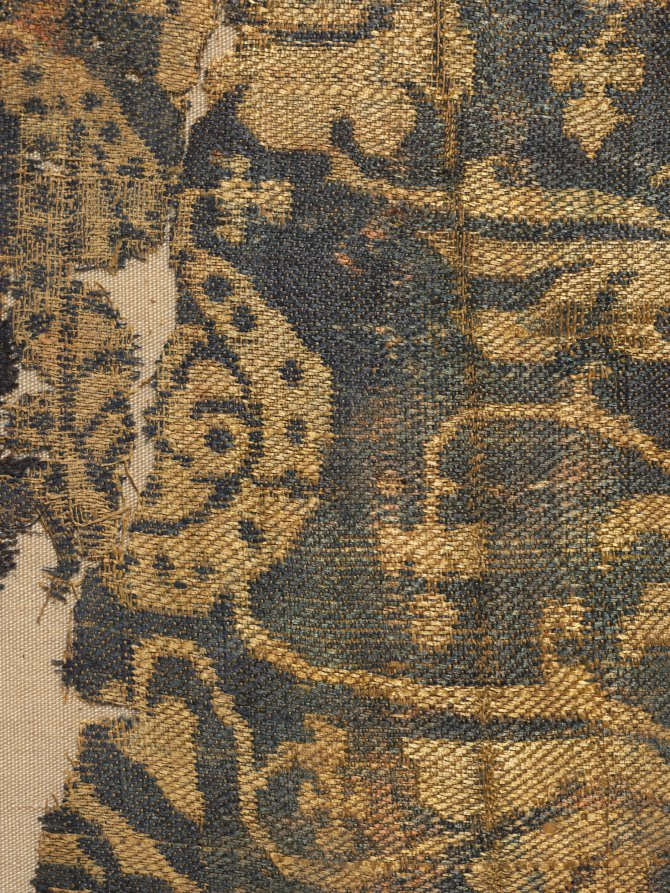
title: Roundel with curvilinear palmette tree, from a tunic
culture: Egypt or Syria(?)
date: 600–850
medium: Silk; complementary weft-faced twill weave with inner warps (samite)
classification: Textile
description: Originally, roundels like this were cut and sewn onto the front and back of a tunic, probably linen, in Egypt. They belong to a sizeable group of comparable silk decorations found in Akhmim, Egypt. In each roundel, a stylized palmette tree is enclosed within a simplified lotus border that evolved from an ancient Egyptian lotus motif.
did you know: This elaborate pattern was woven on a large, early loom known as a drawloom that automatically repeated designs across the width of the fabric.